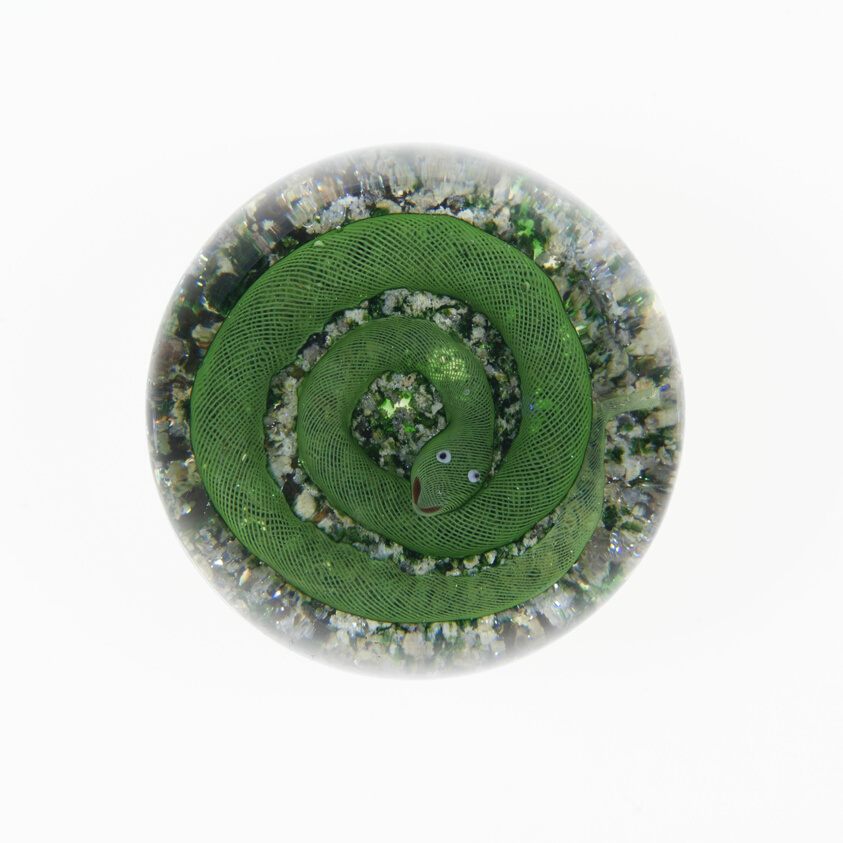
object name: Glass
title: Paperweight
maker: Baccarat Glassworks (Cristalleries de Baccarat); Lorraine, France, founded 1764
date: c. 1848/55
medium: Glass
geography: Lunéville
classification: paperweight; lampwork; european decorative arts; glass